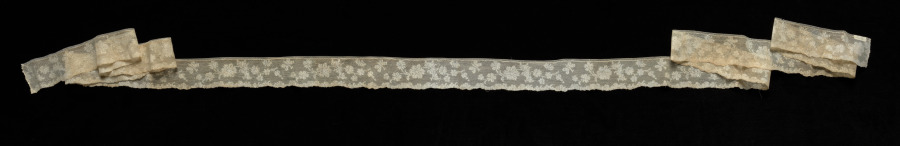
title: Lace Edging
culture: France, Valenciennes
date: 1700s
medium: Bobbin lace (Valenciennes)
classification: Lace